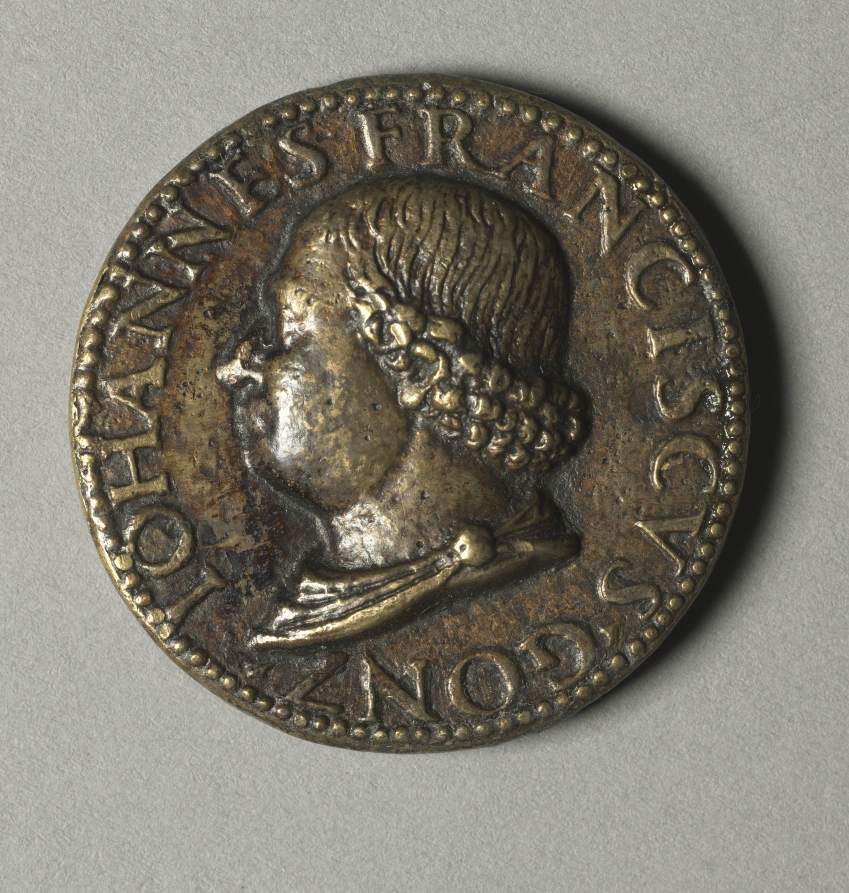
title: Portrait of Gianfrancesco Gonzaga di Ròdigo, 1443-1496, Lord of Sabbionetta (obverse)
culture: Italy, 15th century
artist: Antico (Italian, c. 1460–1528)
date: 1479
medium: bronze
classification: Sculpture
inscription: obverse: IOHANNES FRANCISCVS GONZ(aga)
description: The art of the medal was introduced into Italy by Pisanello, His work as a medalist began with the portrait medal of this emperor, who, in 1438, visited the Council of Ferrara.